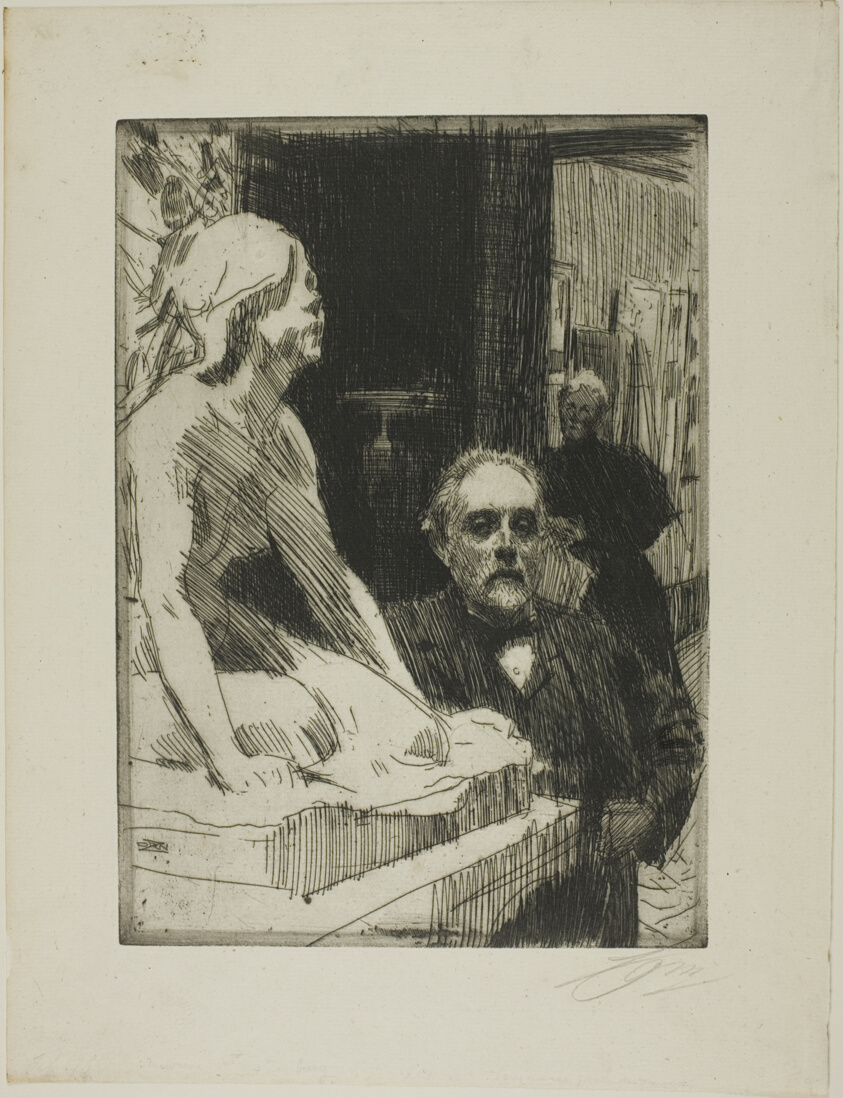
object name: Print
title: Pontus Fürstenberg and his Wife (standing near Hasselberg's "Frog")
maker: Anders Zorn (Swedish, 1860-1920)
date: 1895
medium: Etching on ivory laid paper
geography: Sweden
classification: etching; print; prints and drawing